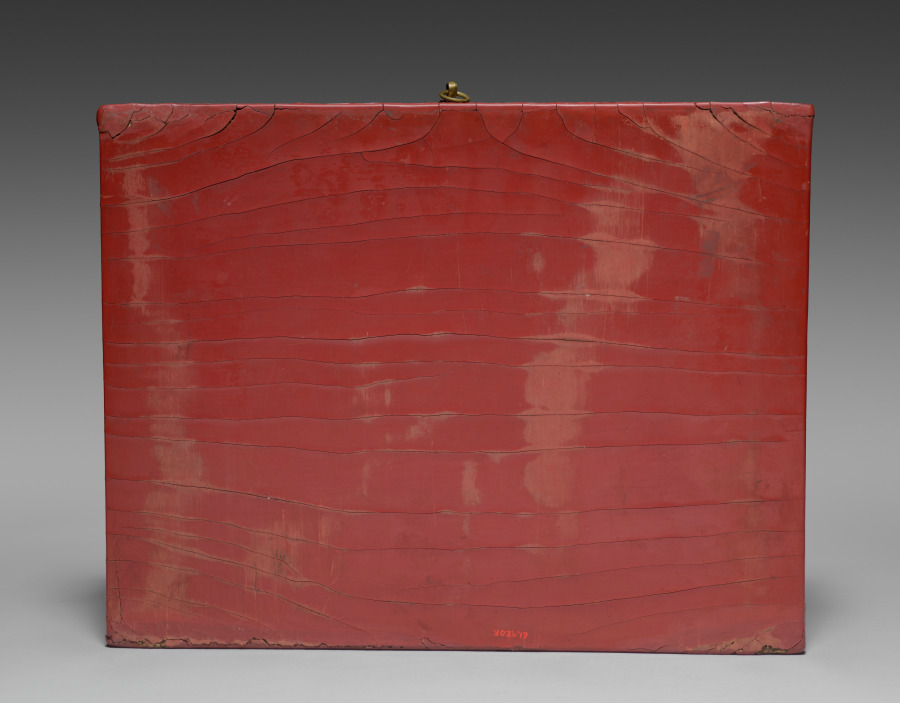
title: Drawer for a Tihong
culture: China, Ming dynasty (1368-1644), Wanli reign (1572-1620)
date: 1585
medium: carved cinnabar lacquer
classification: Lacquer